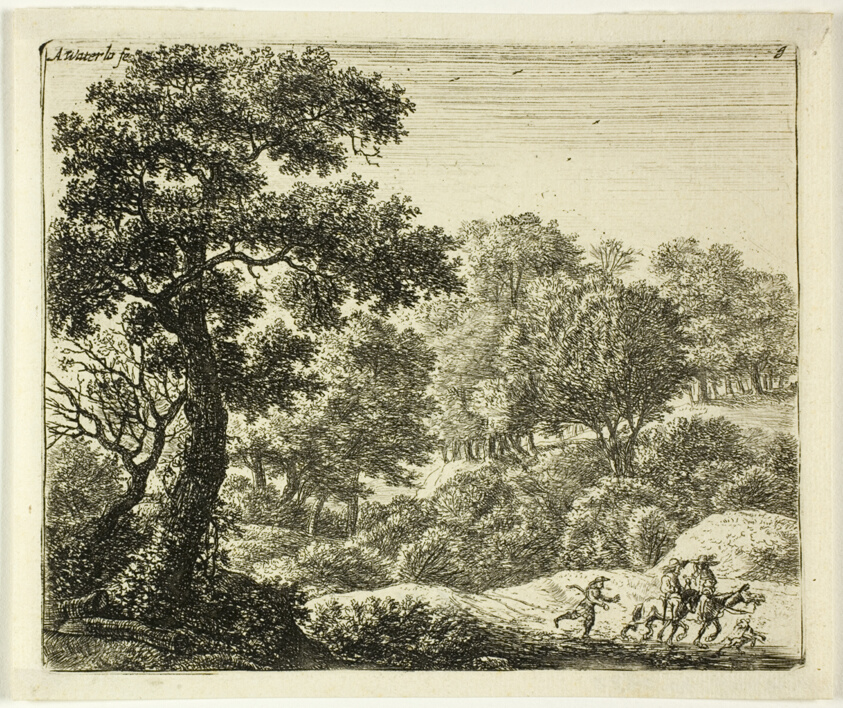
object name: Print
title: The Two Horsemen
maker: Anthonie Waterloo (Dutch, c. 1610-1690)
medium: Etching on paper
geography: Holland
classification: etching; print; prints and drawing